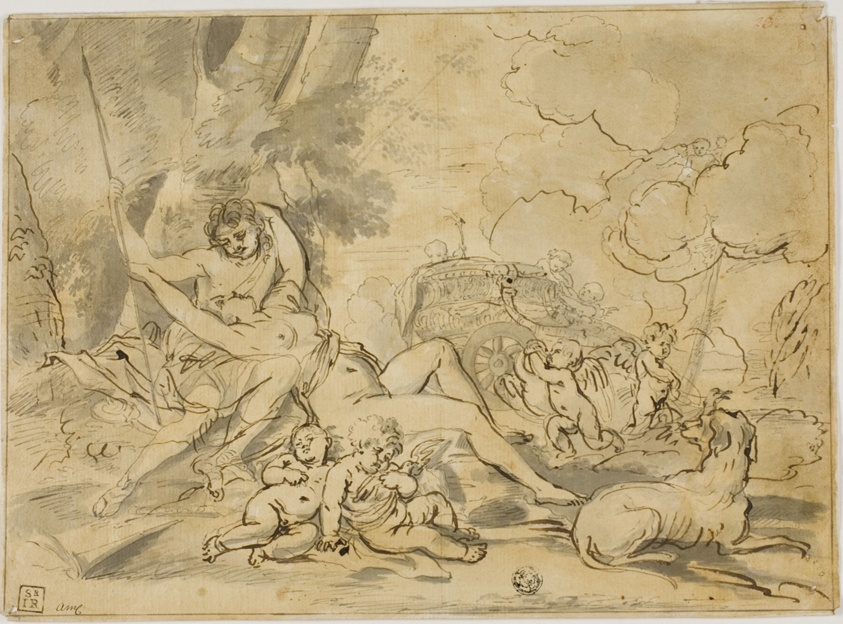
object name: Drawing and Watercolor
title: Figures, Chariot and Dog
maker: After Nicolas Poussin; French, 1594-1665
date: c. 1624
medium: Pen and brown and black ink, with brush and gray wash, on ivory laid paper prepared with a yellow wash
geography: France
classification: pen and ink drawings; drawings (visual works); prints and drawing